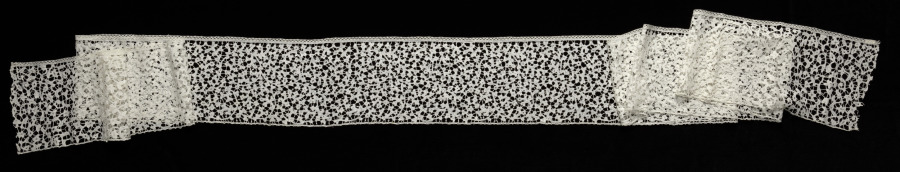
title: Lace Flounce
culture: Italy, Milan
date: 1500s–1600s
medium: Bobbin lace (Punto di Milano)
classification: Lace